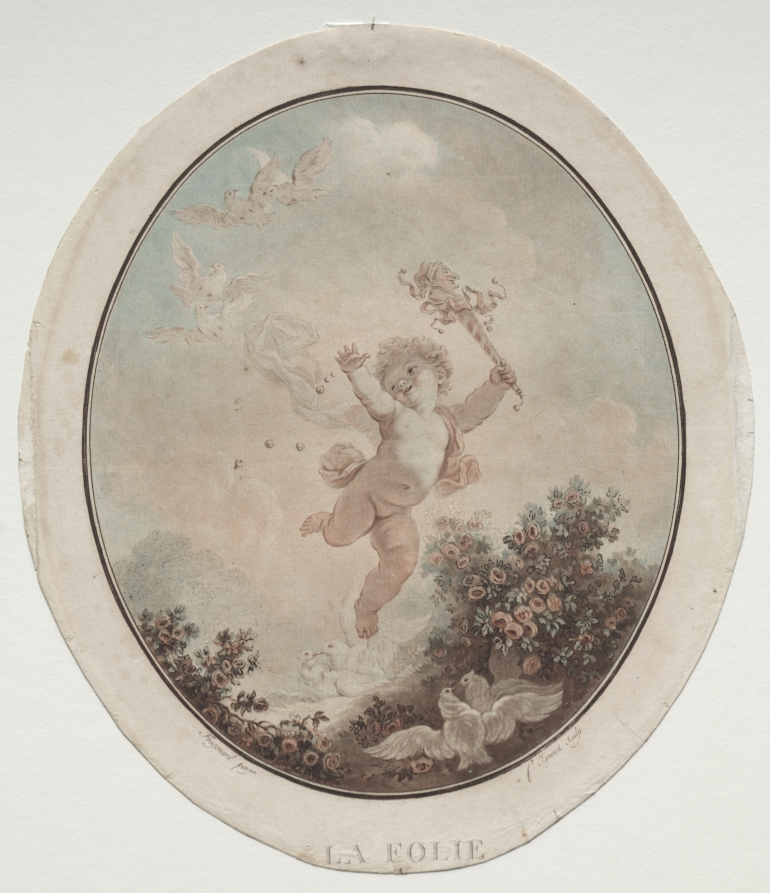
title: Folly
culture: France, 18th century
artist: Jean François Janinet (French, 1752–1814)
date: 1777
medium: aquatint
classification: Print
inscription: On plate below borderline, lower left: "Fragonard pinx"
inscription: on plate below borderline, lower right: "J. Janinet Sculp."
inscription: On plate below borderline, middle of lower margin: "La Folie"